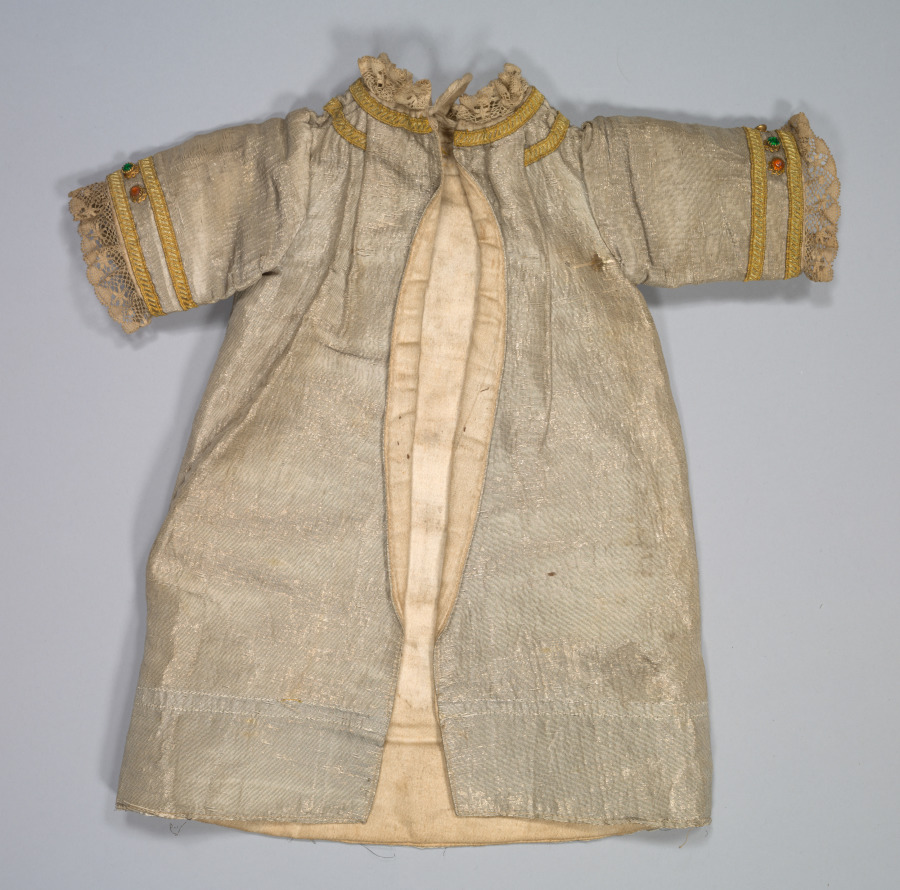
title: Baby's Robe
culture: Spain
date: 1600s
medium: plain weave silk with silver metal thread weft; embroidered with gold and silver metal thread, spangles, and colored glass stones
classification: Garment